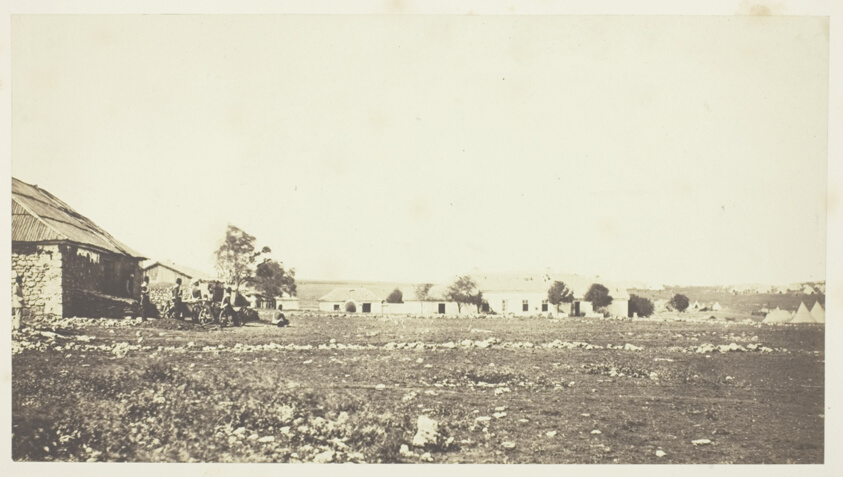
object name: Photograph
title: The British Head Quarters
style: 19th century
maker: Roger Fenton (English, 1819–1869)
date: 1855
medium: Salted paper print, plate 23 from the album "Photographs Taken in the Crimea" (1856)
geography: England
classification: salted paper print; photographic process; photography; photograph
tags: Collected by Hugh Edwards, Crimea 1856